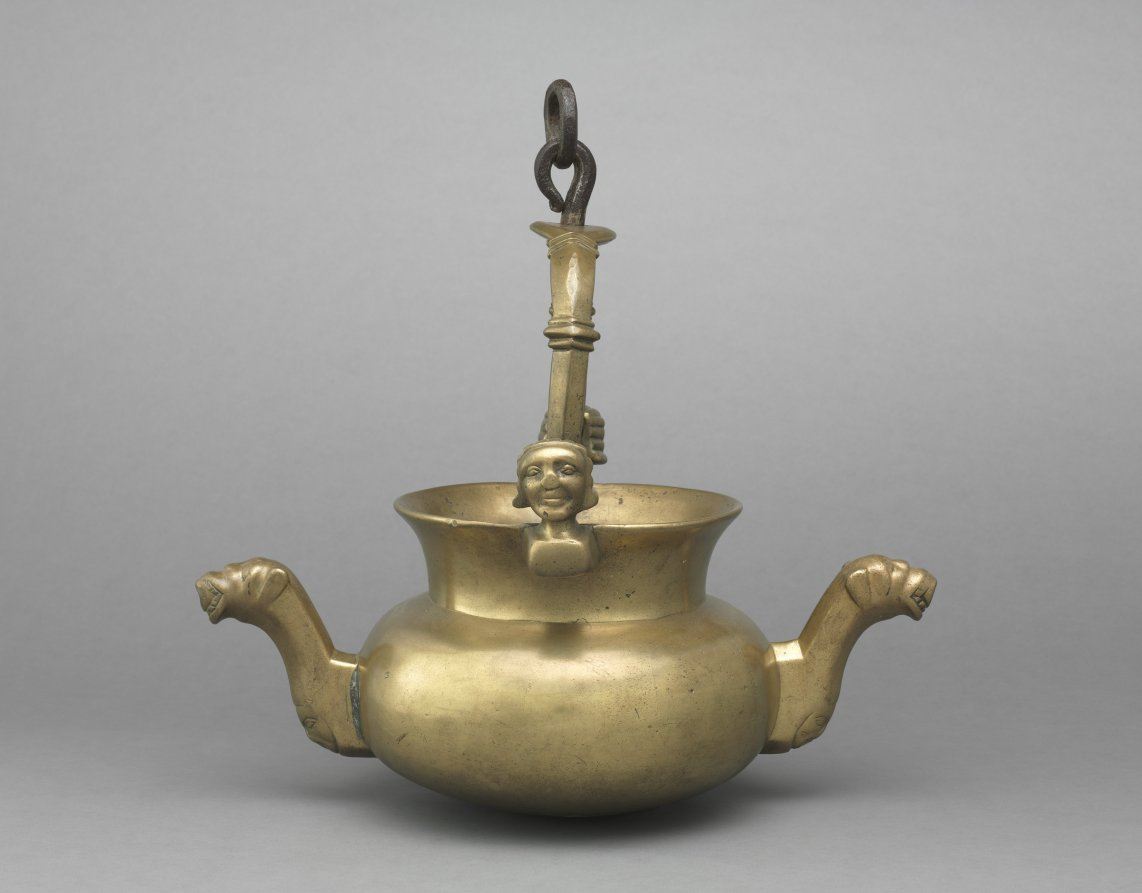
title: Lavabo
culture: South Netherlands, Valley of the Meuse, 15th century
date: 1400s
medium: brass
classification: Metalwork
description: In the Middle Ages a variety of vessels were used for hand washing. This brass container, called a lavabo, was designed to hold a large quantity of water and may have functioned in either a domestic or a liturgical setting. Its large capacity and relatively simple decoration suggests it served a communal function, either in a private home or perhaps in a monastery where it would have served as a hand-washing station near the refectory. In private homes, lavabos of similar design were usually hung from a chain or a trammel hook over or near the fire in the kitchen. The ring inserted at the top of the handle would have allowed for the rotation of the vessel while it was suspended, facilitating access to the spouts for water. Seen in conjunction with other vessels displayed nearby, this object illustrates the variety of hand-washing vessels used by medieval men and women.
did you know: On either side of the handle appear two human faces while the spouts themselves are animals, perhaps lions or dogs.